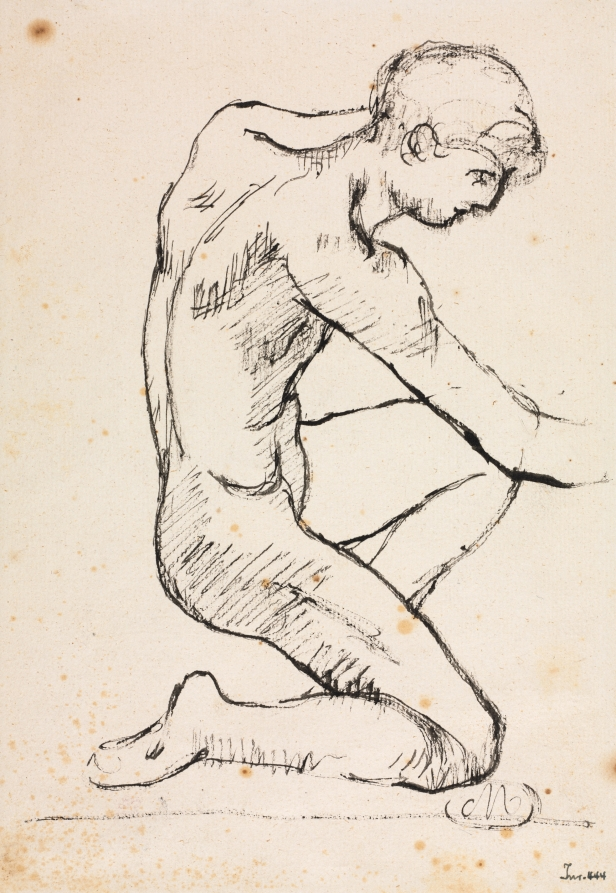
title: Study of a Male Nude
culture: France, 20th century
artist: Aristide Maillol (French, 1861–1944)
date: c. 1907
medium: pen and brush and black ink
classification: Drawing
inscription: signed, lower right, in black ink: [artist's monogram: M (circled)] ; lower right, in brown ink: Inv. 444 ; VERSO, lower right, in graphite: Maillol Etude d'ephèbe ; lower right, in brown ink: 159 [sideways]